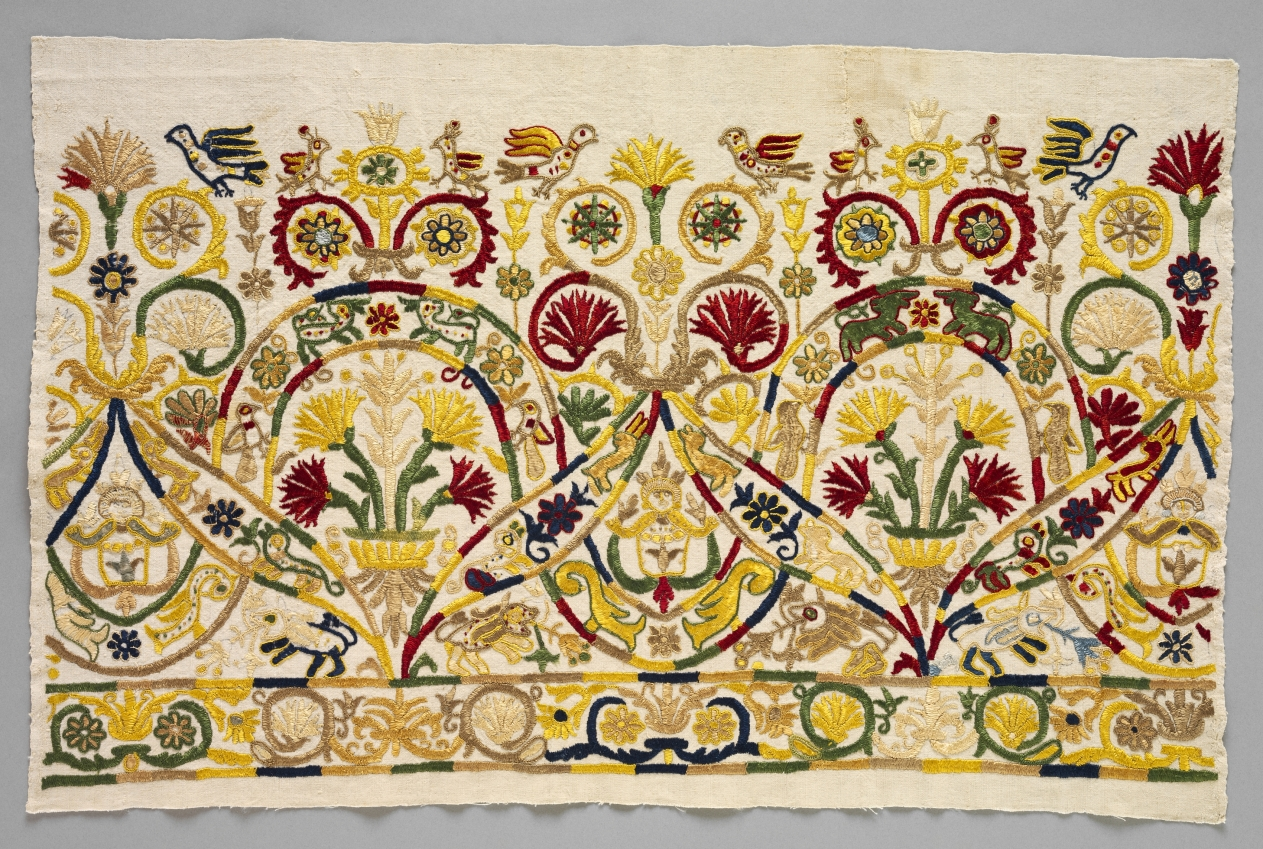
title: Fragment of a Skirt Border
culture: Greece, Crete, 18th century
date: 1700s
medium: embroidery: silk on linen tabby ground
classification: Embroidery